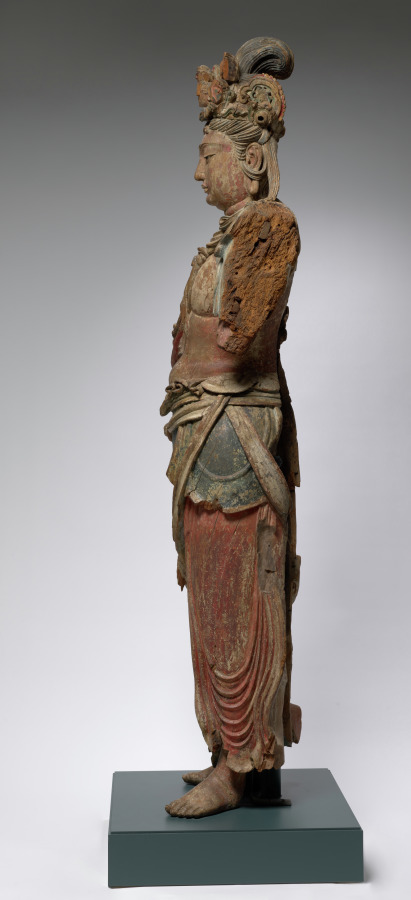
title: Eleven-Headed Guanyin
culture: China, late Northern Song dynasty (960-1127) - Jin dynasty (1115-1234)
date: 1100–1200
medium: wood with polychromy and cut gold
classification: Sculpture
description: The bodhisattva is an enlightened being dedicated to the spiritual awakening of all beings. The compassionate bodhisattva Guanyin, in a variety of manifestations, is probably the most popular deity of worship in Chinese Buddhism. In the Esoteric Buddhist form shown here, this standing Guanyin has a total of eleven heads, with smaller ones above the principal head. The uppermost head represents the Buddha Amitabha, to whom he is closely related. The eleven heads symbolize the Buddha’s steps on the path to enlightenment.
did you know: This Guanyin is carved from a single block of willow (genus Salix sp.).